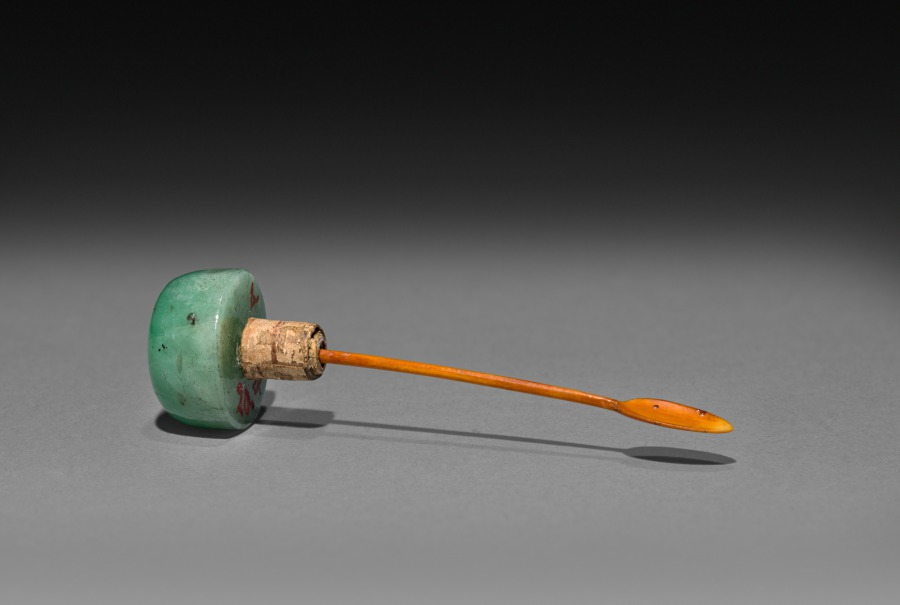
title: Snuff Bottle (stopper)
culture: China, Qing dynasty (1644-1911)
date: 1644–1911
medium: glass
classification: Glass